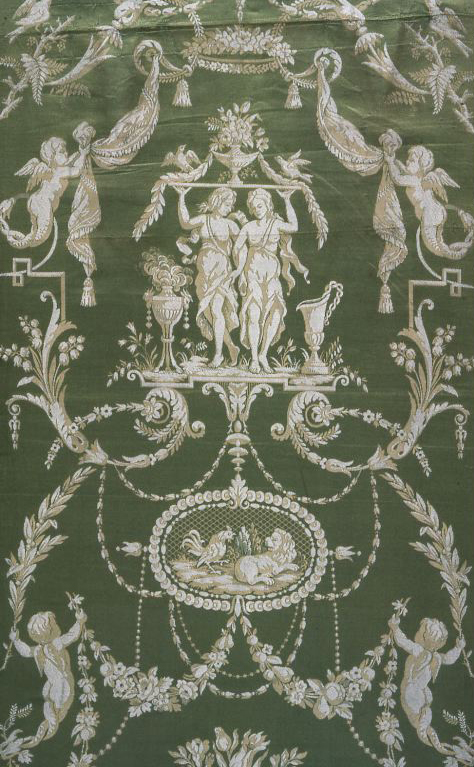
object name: Textile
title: Panel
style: directoire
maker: France, Lyon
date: Directoire period, c. 1790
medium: Silk, satin weave with plain and twill interlacing of secondary binding warps and patterning wefts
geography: France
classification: textile; weaving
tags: lions, animals